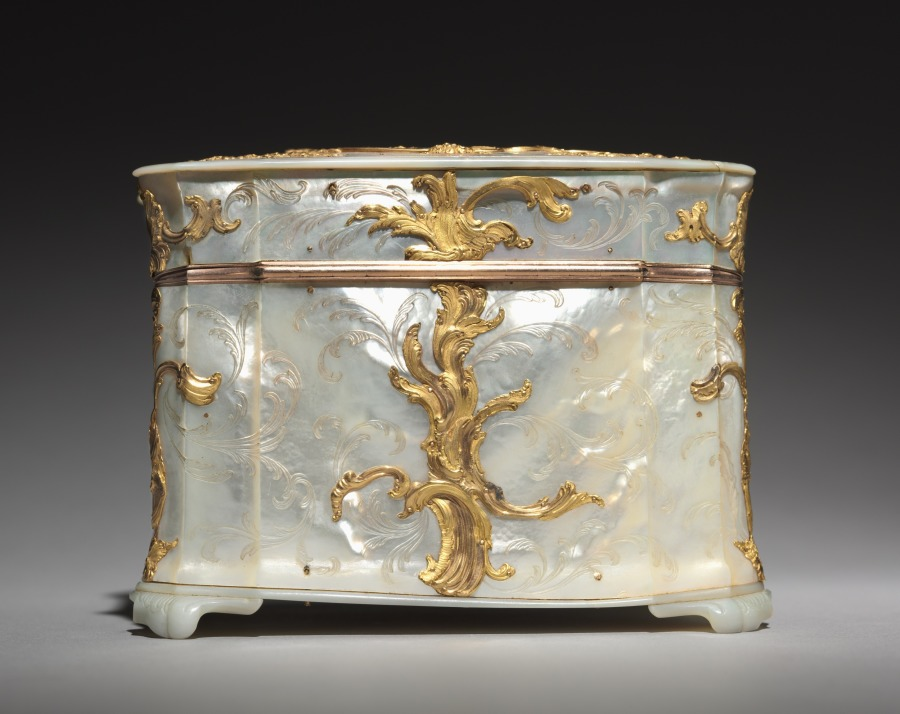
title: Sewing Box with Implements (Nécessaire)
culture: Austria, possibly Vienna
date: c. 1765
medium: gold and mother-of-pearl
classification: Miscellaneous